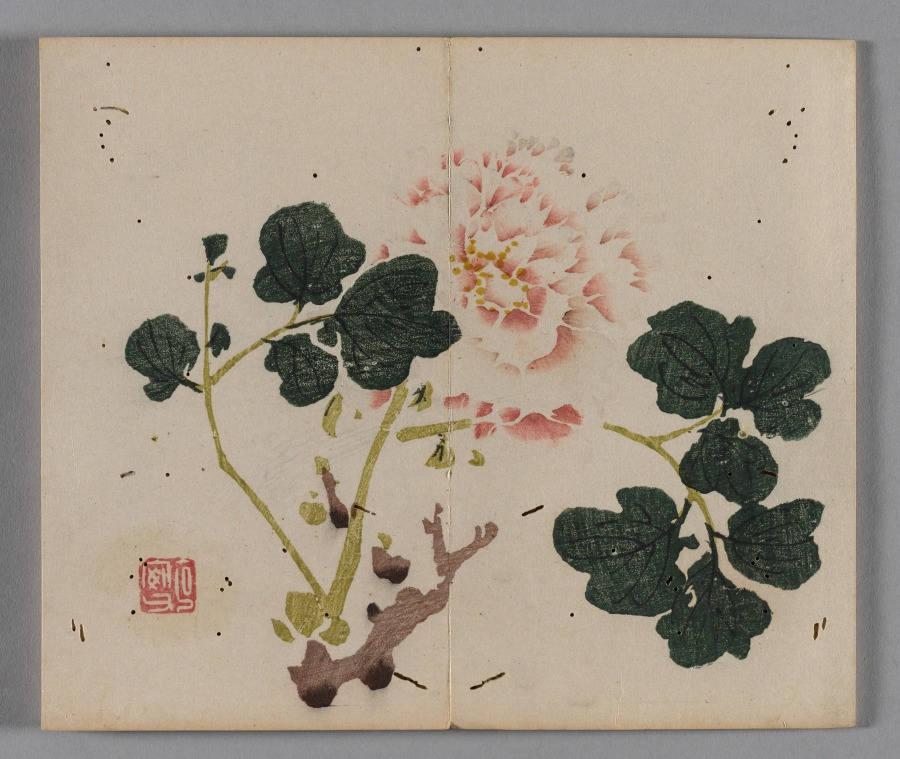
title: Ten Bamboo Studio Painting and Calligraphy Handbook (Shizhuzhai shuhua pu): Miscellaneous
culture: China, Qing dynasty (1644-1911)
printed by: Hu Zhengyan (Chinese, c. 1584–1674)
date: 1633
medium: Woodblock-printed book; ink and colors on paper; first edition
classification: Print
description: Color printing reached a level of perfection in the early 1600s, as seen in this Ten Bamboo Studio Collection of Calligraphy and Painting and the Mustard Seed Garden Manual of Painting (printed 1679 and 1701). The painterly quality, precision in registering (aligning) the woodblocks, and harmonious colors made them the most successful color print editions in Chinese history. Both editions were printed and compiled in Nanjing, spread nationwide, and had a great impact on the arts in Japan and Korea.